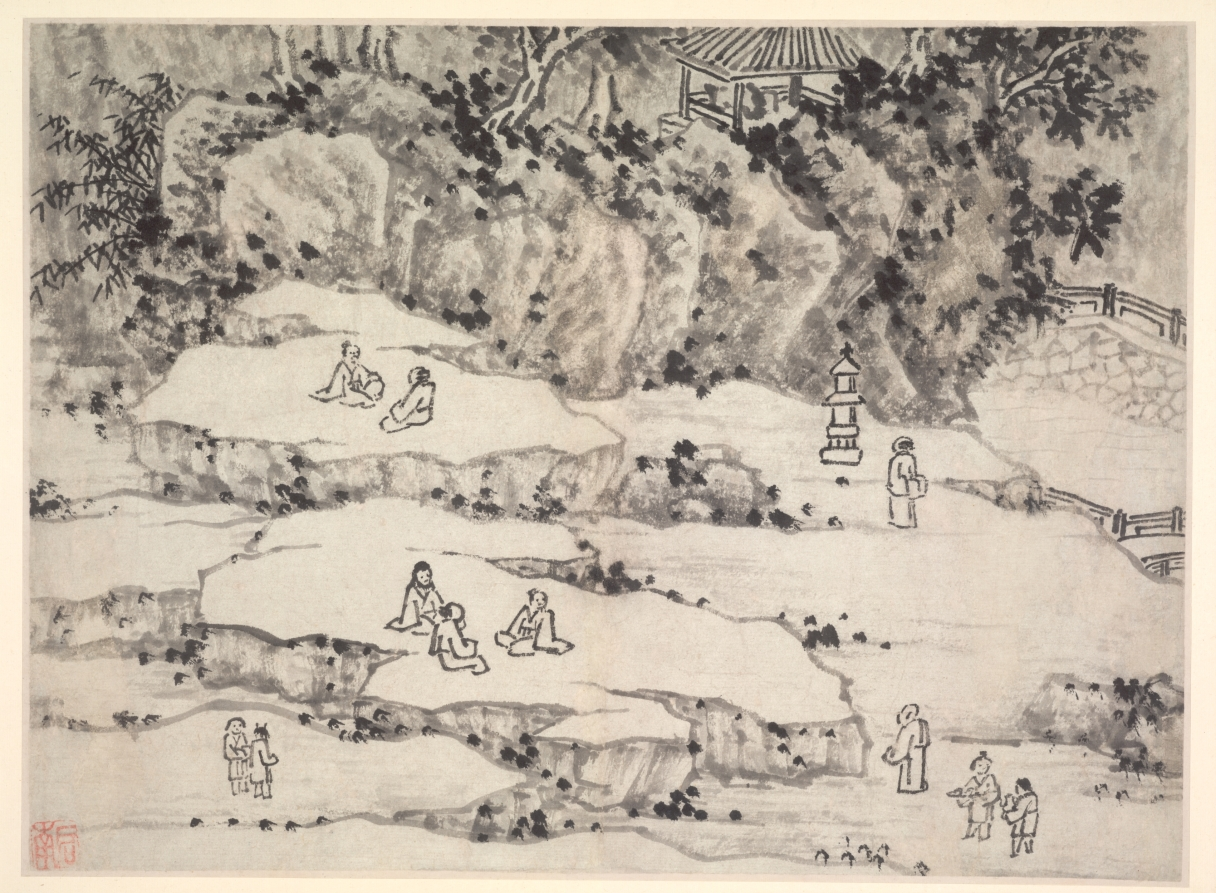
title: The Nodding Stone Terrace, Tiger Hill, and the Thousand-Man Seat, from Twelve Views of Tiger Hill, Suzhou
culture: China, Ming dynasty (1368–1644)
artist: Shen Zhou (Chinese, 1427–1509)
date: after 1490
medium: Album leaf; ink on paper or ink and slight color on paper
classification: Painting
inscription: [印] 启南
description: Views of Tiger Hill depicts a historic site a few miles northwest of Suzhou. The scenes simulate a visit from arriving by boat at the foot of the mountain to climbing to Cloudy Cliff Monastery. Representations of the artist’s mature style, Shen Zhou included views in subtle colors in the suite of monochrome scenes. A Suzhou native, Shen Zhou was supported by family wealth and rejected an official career in favor of life as a retired scholar. Turning to painting in midlife, he is regarded as the founder of the Wu School of painting, with its center in Suzhou.